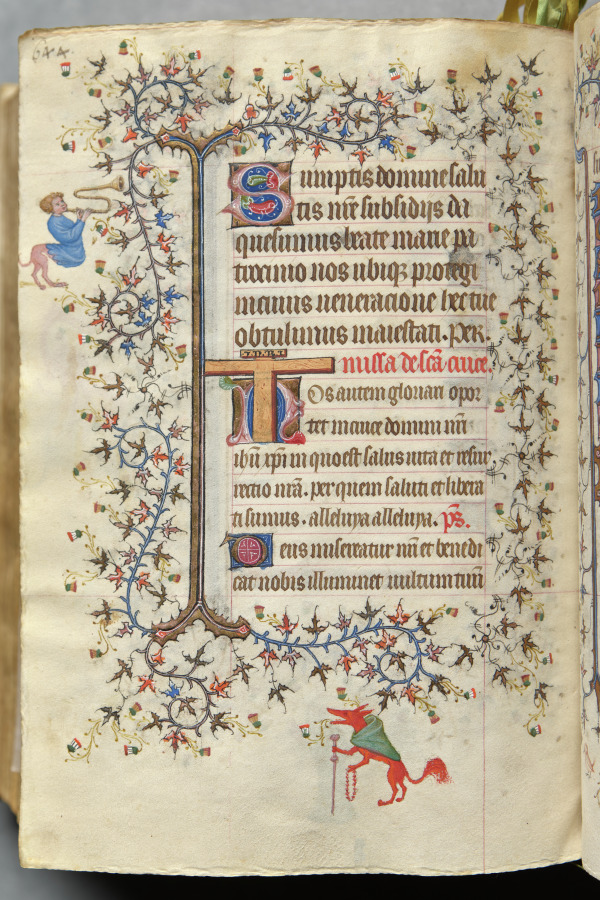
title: Hours of Charles the Noble, King of Navarre (1361-1425), fol. 316v, Text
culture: France, Paris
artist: Master of the Brussels Initials and Associates (French)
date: c. 1405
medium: ink, tempera, and gold on vellum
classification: Bound Volume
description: This precious volume was obviously highly prized by its owner, the French-born King of Navarre, who had his coat of arms painted on no less than twenty folios. Rather than directly commissioning this manuscript from a specific workshop, it seems that Charles the Noble acquired his book of hours -- perhaps ready-made for the luxury market -- while on a trip to Paris in 1404-05. A collaborative effort, six painting styles are evidenced within the pages of this codex, those of two Italians, two Frenchmen, and two Netherlanders. The painter who was responsible for the planning and decoration of the book, and who produced seventeen of the large miniatures, was a Bolognese artist known as the Master of the Brussels Initials. His principal assistant, responsible for most of the borders, was a Florentine who signed his name "Zecho" da Firenze on folio 208 verso.